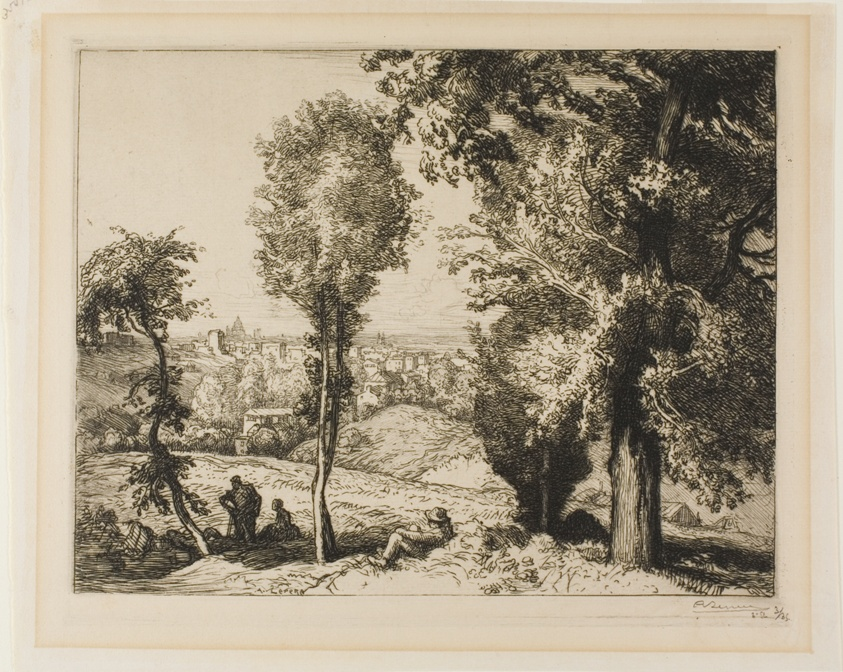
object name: Print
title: To Gentilly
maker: Louis Auguste Lepère (French, 1849-1918)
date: 1910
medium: Etching on cream laid paper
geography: France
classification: etching; print; prints and drawing